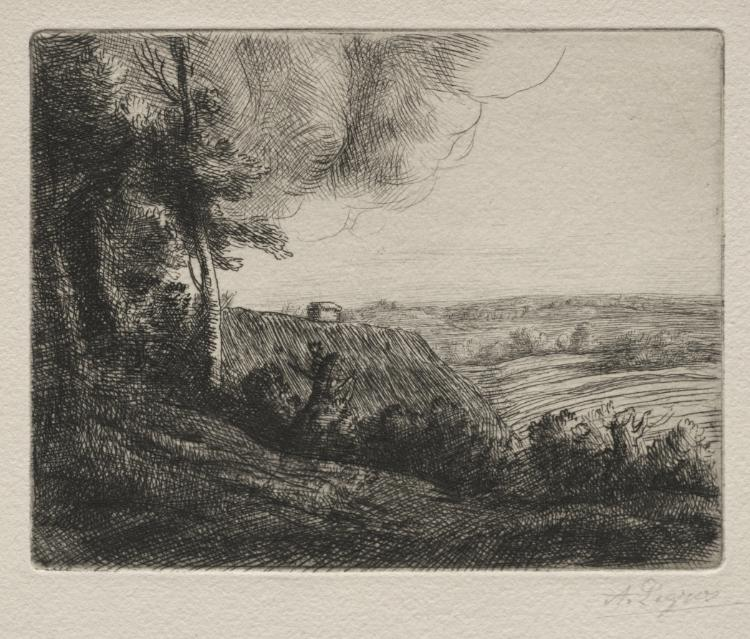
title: Landscape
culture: France, 19th-20th century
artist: Alphonse Legros (French, 1837–1911)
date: c. 1857–1911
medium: etching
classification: Print